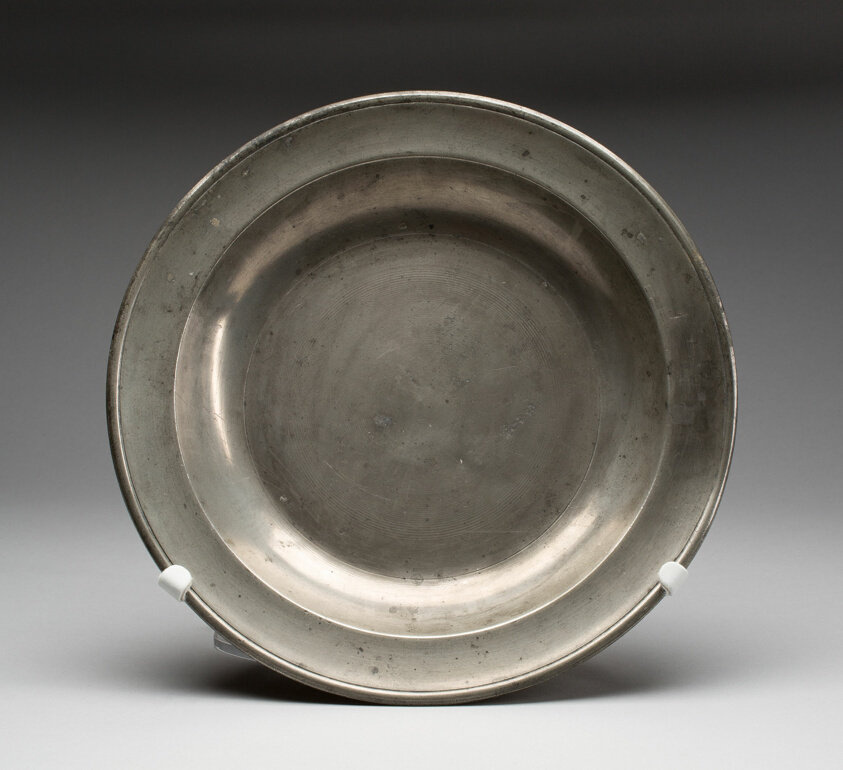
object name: Decorative Arts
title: Charger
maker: Thomas Danforth III; American, 1756–1840; Philadelphia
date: 1807–11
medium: Pewter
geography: Philadelphia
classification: plate (general, dish); metalwork; american decorative arts; american arts; decorative arts